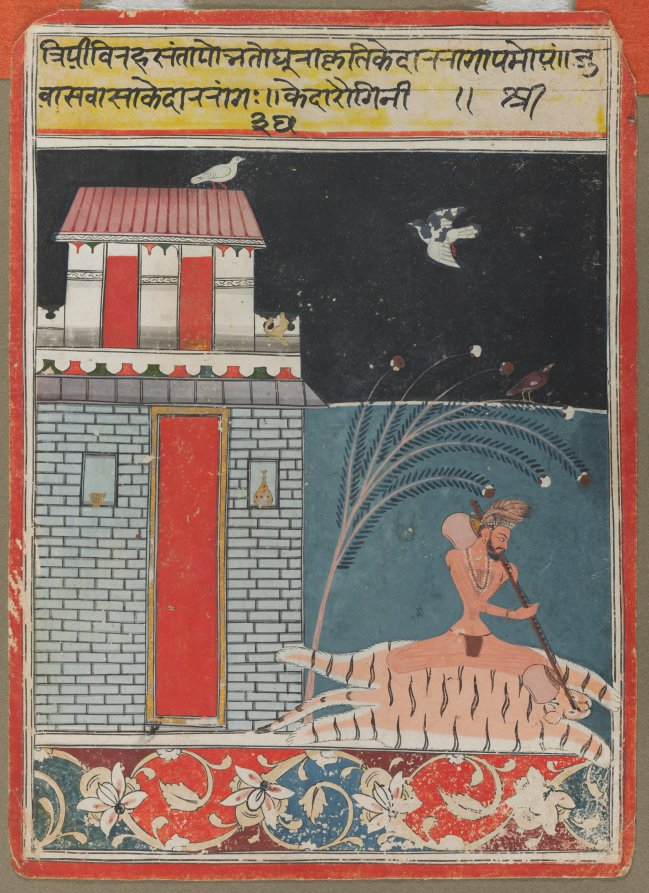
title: Kedara Ragini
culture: Central India, Malwa school, 17th century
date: c. 1660–70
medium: Gum tempera and gold on paper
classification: Painting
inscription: Labeled on reverse: "Kedara"; numbered on obverse: "35"